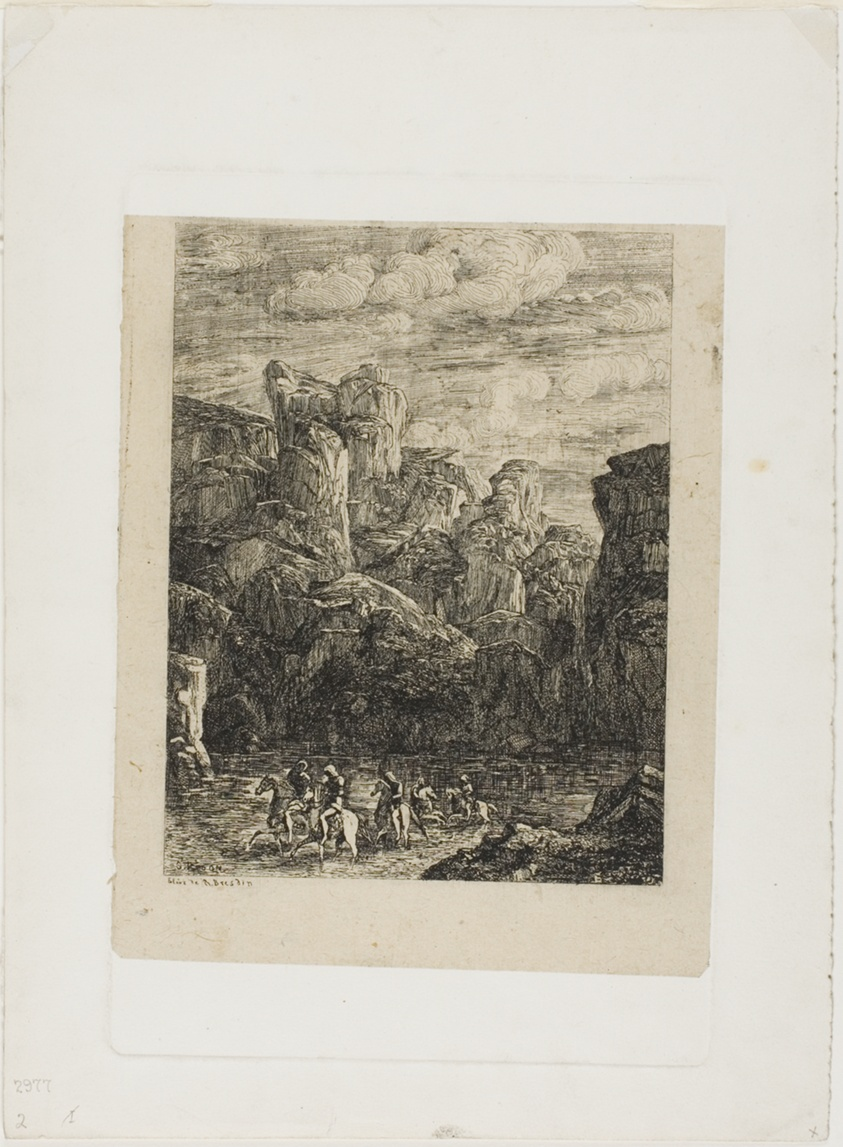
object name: Print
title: The Ford: Landscape with Horsemen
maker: Odilon Redon (French, 1840-1916)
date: 1866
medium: Etching on mounted cream China paper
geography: France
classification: etching; print; prints and drawing; paper